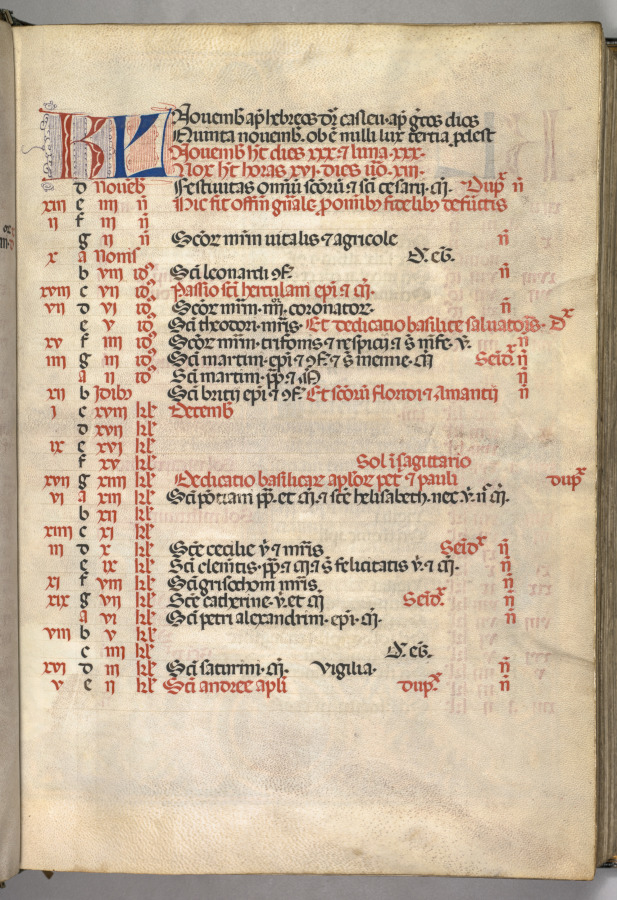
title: Missale: Fol. 8r: November Calendar Page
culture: Italy, Perugia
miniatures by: Bartolommeo Caporali (Italian, c. 1420–1503)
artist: assisted by Giapeco Caporali (Italian, d. 1478)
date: 1469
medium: ink, tempera and burnished gold on vellum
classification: Bound Volume